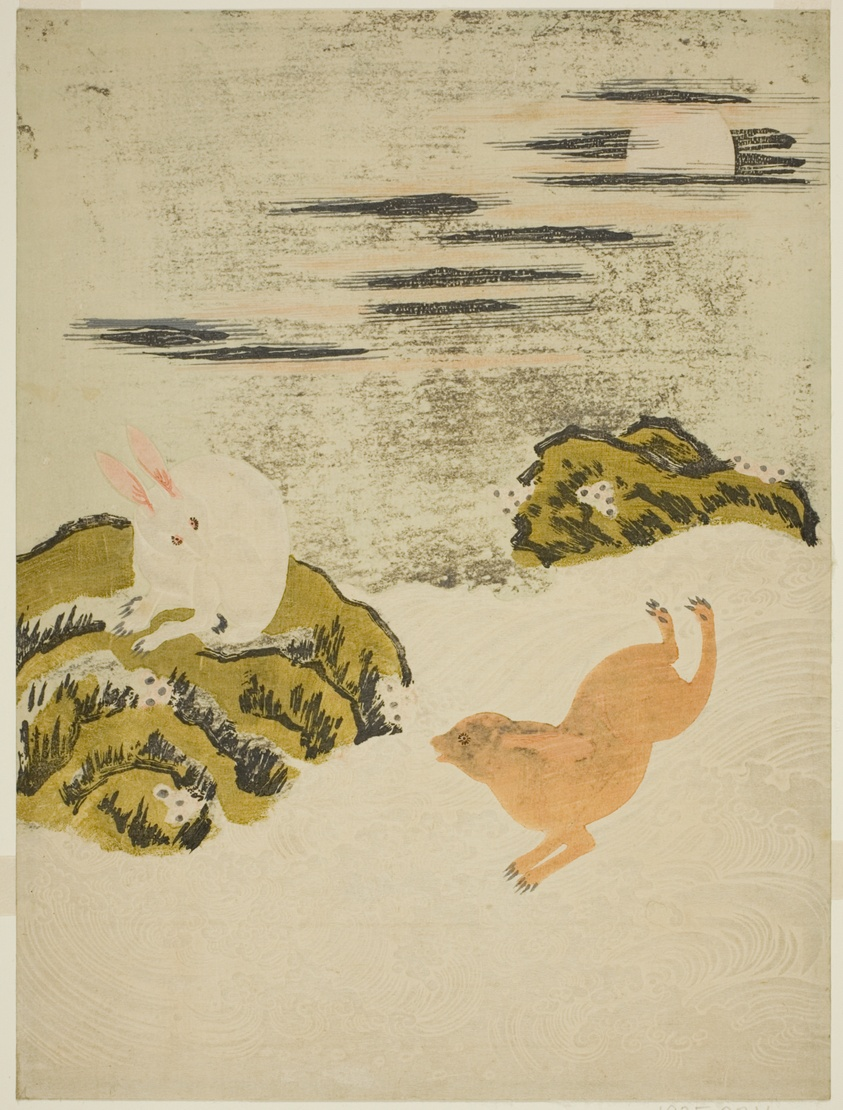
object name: Print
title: Hares Playing in Surf on a Moonlit Night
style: Japanese (culture or style)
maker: Attributed to Isoda Koryusai; Japanese, 1735-1790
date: c. 1771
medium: Color woodblock print; chuban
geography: Japan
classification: woodblock print; print; asian art